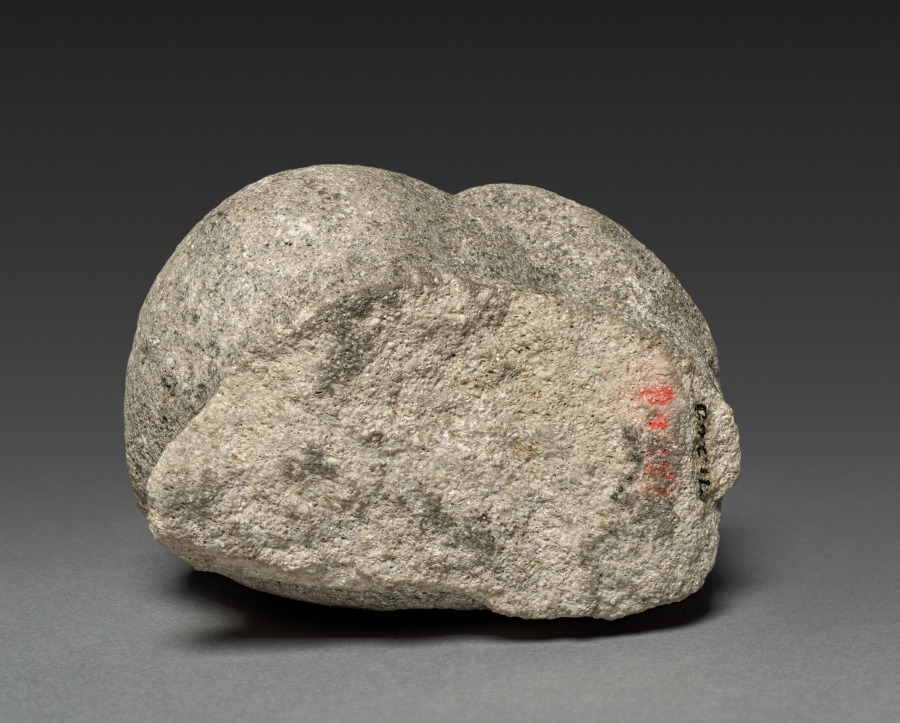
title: Spherical Fragment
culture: France(?)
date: 1200s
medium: limestone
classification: Sculpture